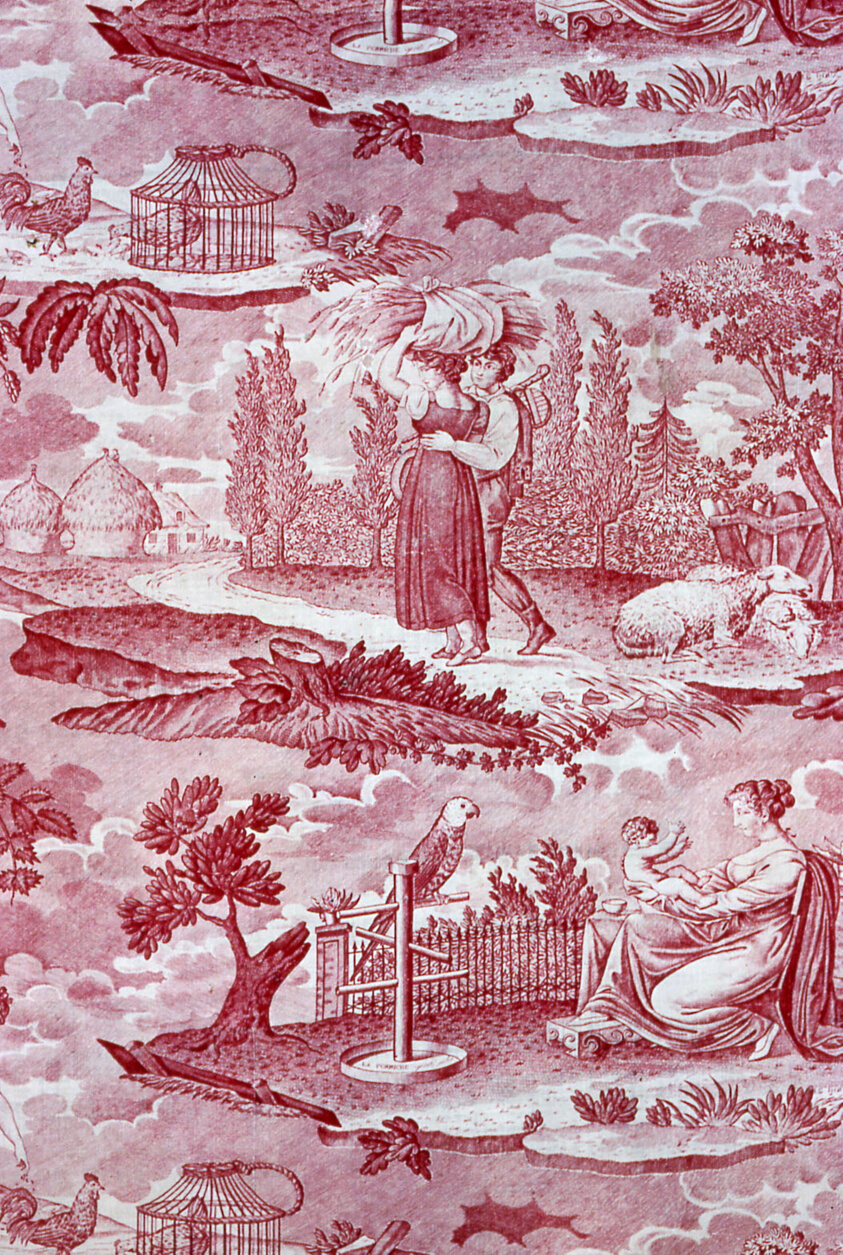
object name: Textile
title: Le Kakatoes (The Cockatoo) (Furnishing Fabric)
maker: Designed by Francois Pieters (French, active c. 1820); Possibly Manufactured by Favre-Petitpierre et Cie. (French, 1802-1818); France, Rouen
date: c. 1815/20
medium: Cotton, plain weave; engraved roller printed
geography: Rouen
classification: textile; weaving - printed; furnishing textile